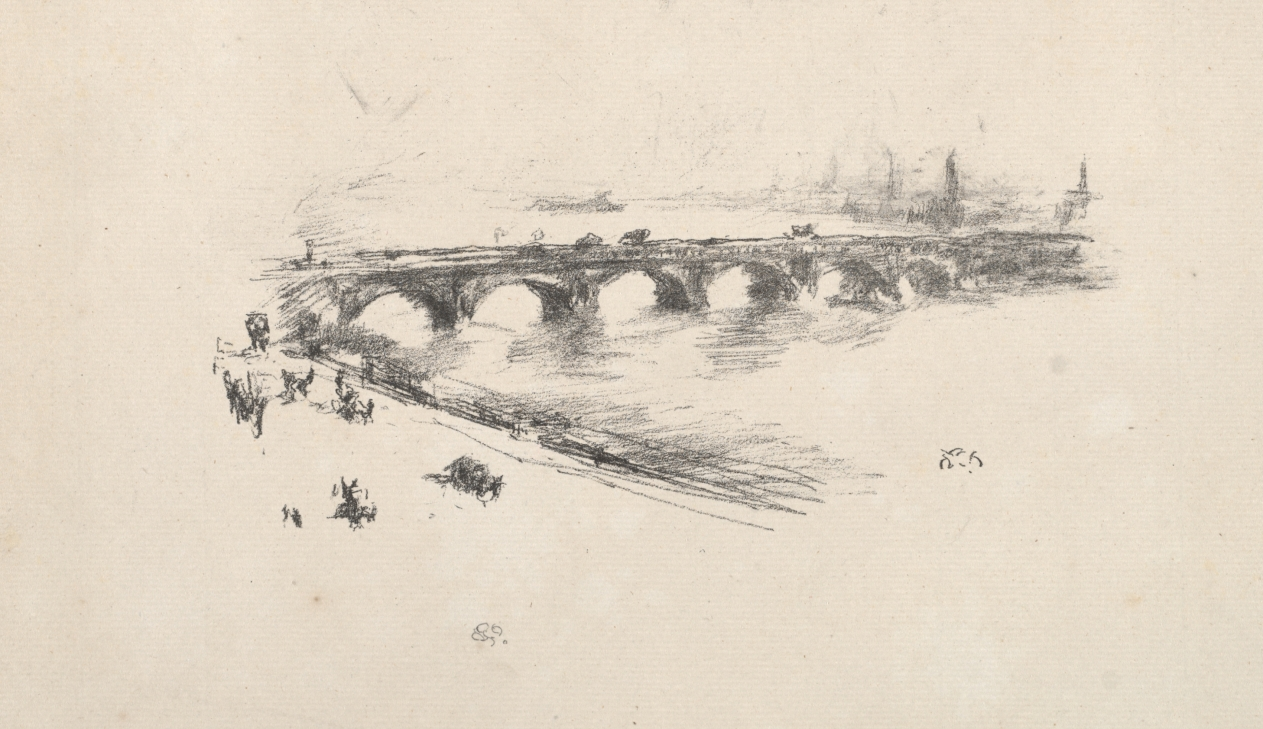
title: Evening, Little Waterloo Bridge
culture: America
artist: James McNeill Whistler (American, 1834–1903)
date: 1896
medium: lithograph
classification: Print